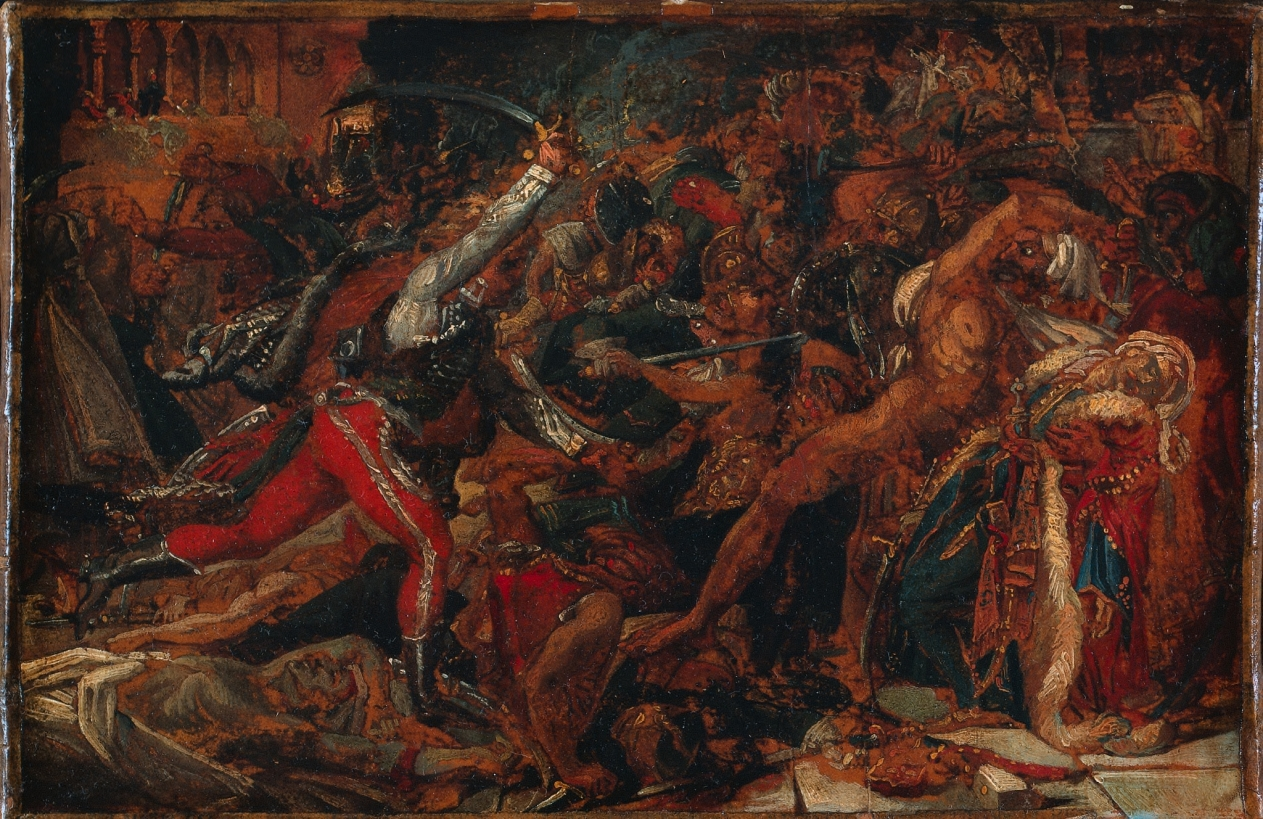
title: Sketch for "The Revolt at Cairo"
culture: France, 19th century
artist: Anne-Louis Girodet de Roucy-Trioson (French, 1767–1824)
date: c. 1809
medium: oil on paper, mounted on paper and canvas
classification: Painting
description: Throughout the 1800s and into the 1900s, prints, paintings, and photographs, like Louis Haghe’s Egypt and Nubia series, brought back by artists who voyaged to Egypt, inspired American and European artists, architects, and designers to emulate ancient Egyptian motifs and styles. Egyptomania blossomed through the 1800s and can be seen in architecture around cities like Washington, DC, and in the interiors of aristocratic homes, as well as in funerary monuments, such as in Lake View Cemetery in Cleveland, Ohio. Looking back at these creations provides an interesting historical groundwork for debating who has the right to interpret Egyptian motifs and styles.